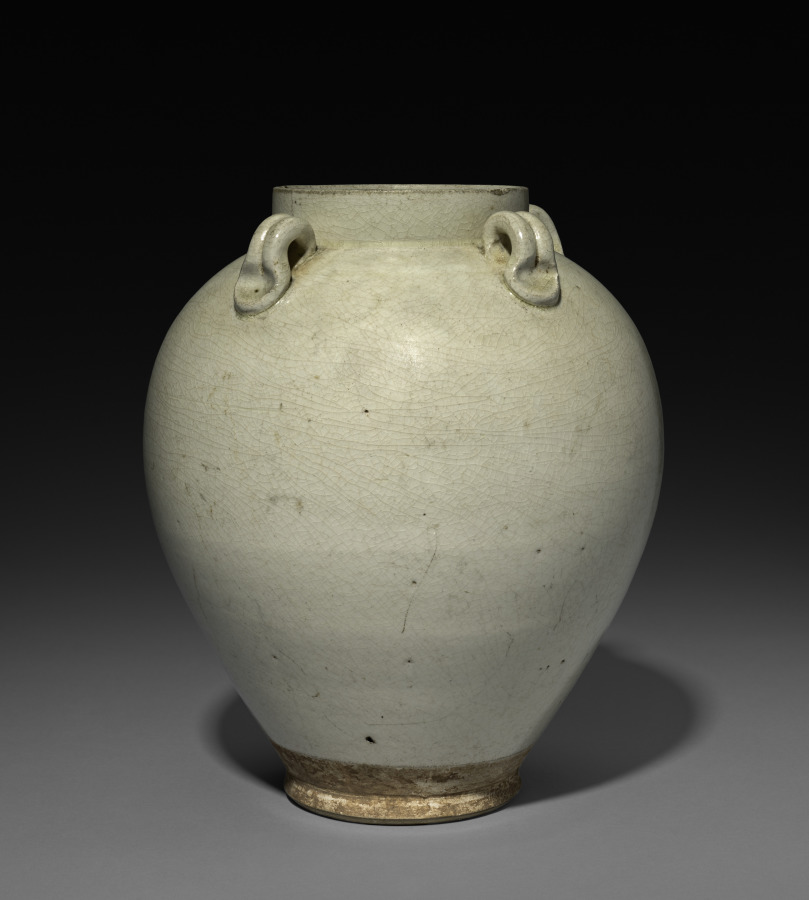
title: Jar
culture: China, Tang dynasty (618-907)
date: mid-600s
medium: glazed stoneware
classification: Ceramic